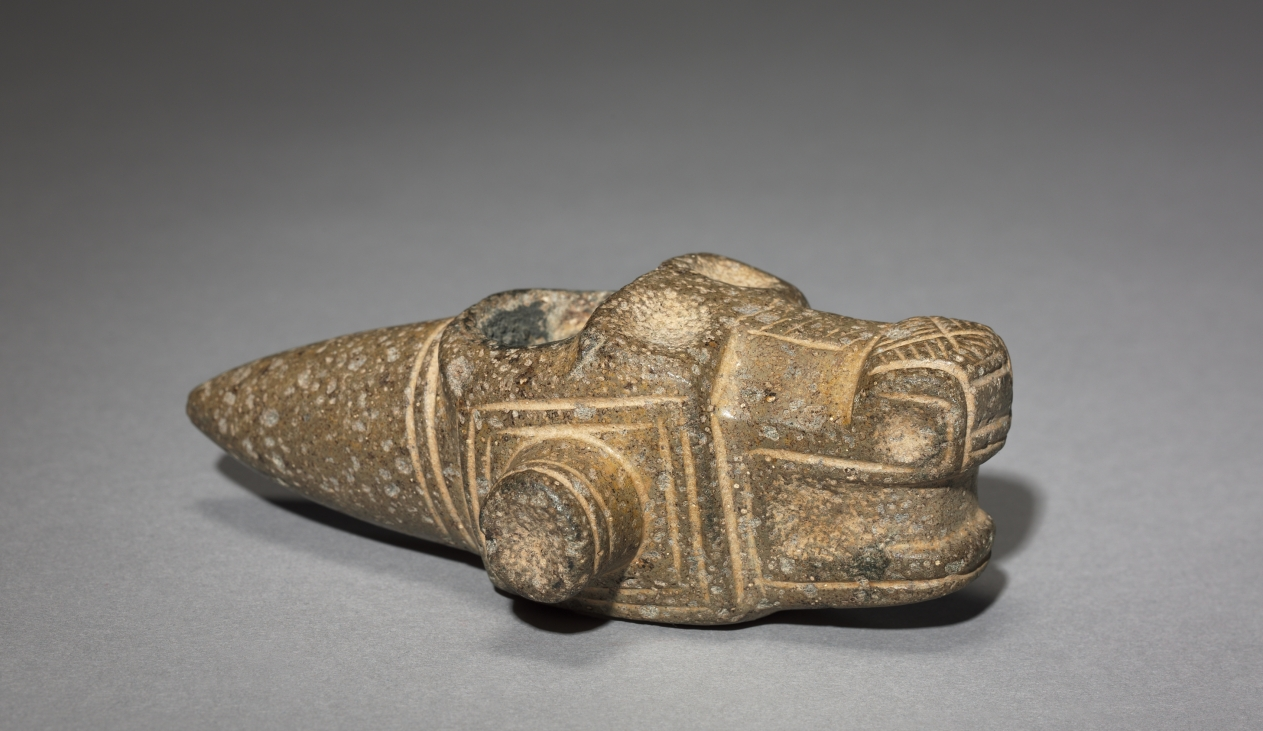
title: Mace Head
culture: Costa Rica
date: 300–500 CE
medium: pecked and polished gray stone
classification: Sculpture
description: Once mounted on wooden shafts, elaborately shaped mace (club) heads like this one probably were not used as weapons. Rather, they could have served as emblems of chiefly authority, group insignia, the heads of ceremonial weapons, or all three. They eventually were placed in elite graves. The back-curled nose on this example may refer to a crocodile or caiman.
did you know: In ancient Costa Rica, it was believed that the world rested on the back of a crocodile.